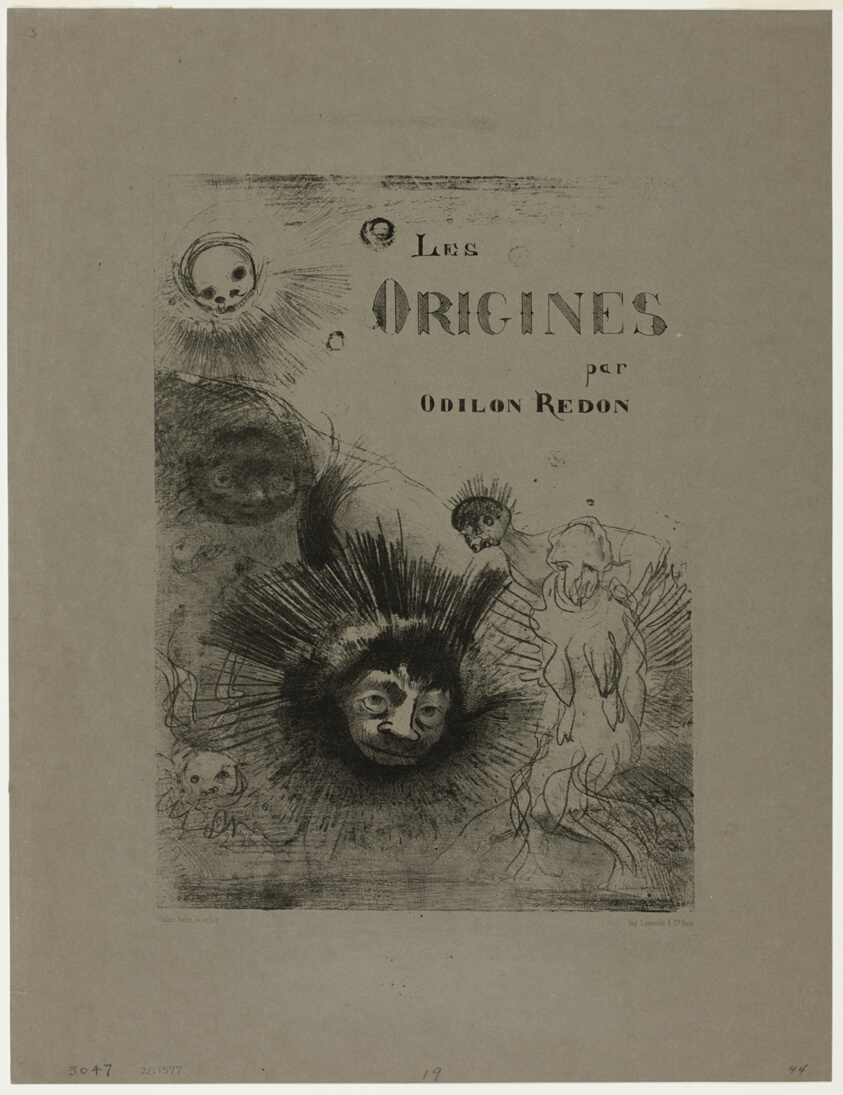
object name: Print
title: Cover-Frontispiece for Les Origines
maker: Odilon Redon (French, 1840-1916)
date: 1883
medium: Lithograph in black on dark gray wove paper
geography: France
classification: lithograph; print; prints and drawing; paper